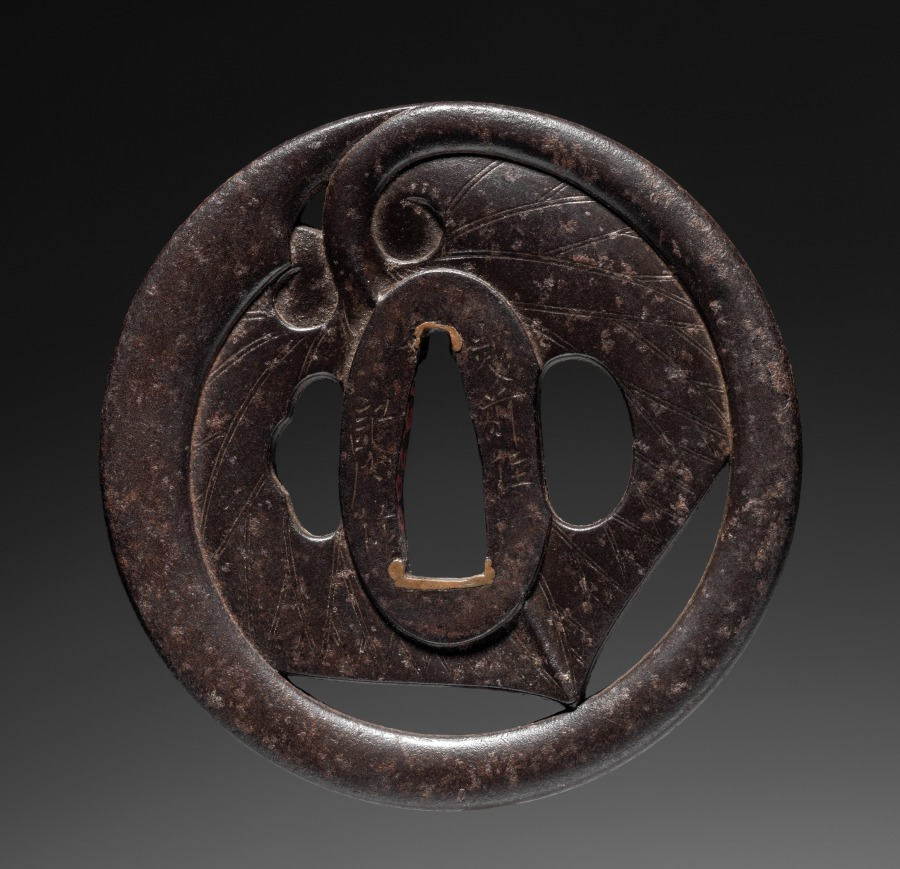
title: Sword Guard (Tsuba) with Hollyhock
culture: Japan, possibly Edo period (1615-1868)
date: c. 1615–1868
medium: iron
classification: Arms and Armor